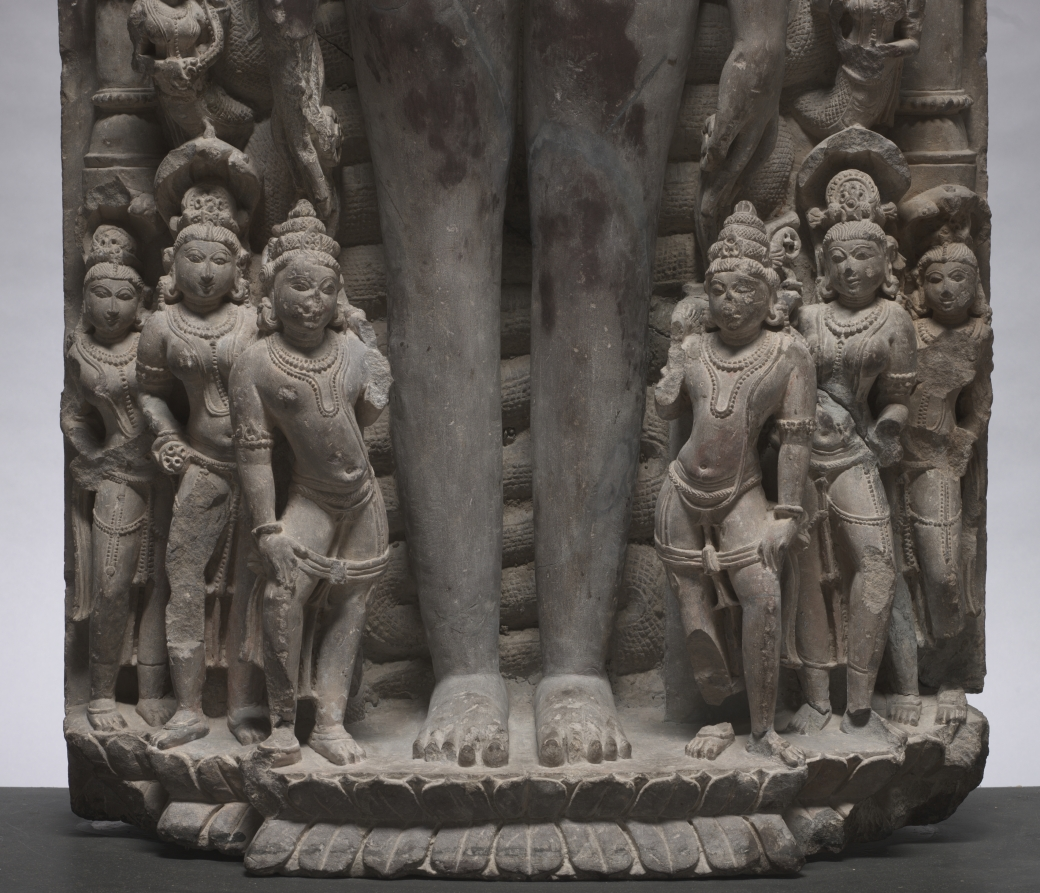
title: Parshva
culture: Central India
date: 800s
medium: sandstone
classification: Sculpture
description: Parshva is the 23rd of the 24 Jinas who achieved liberation. He is the only one who is depicted with a serpent. This sculpture was made for followers of the branch of Jainism called Digambara, who enforce the regulations of total nudity among those actively seeking liberation. The only adornment of his figure is the auspicious symbol on his chest and the wheels of righteousness on his palms. The stark form of thenude body standing in a posture of meditation is masterfully set off from the array of gods and serpent divinities who venerate him. He stands with his feet on a lotus pedestal, but his hierarchically tall form reaches to the heavens, where gods fly to honor him with flower garlands. Three umbrellas over his head indicate his status as a liberated being worthy of worship.